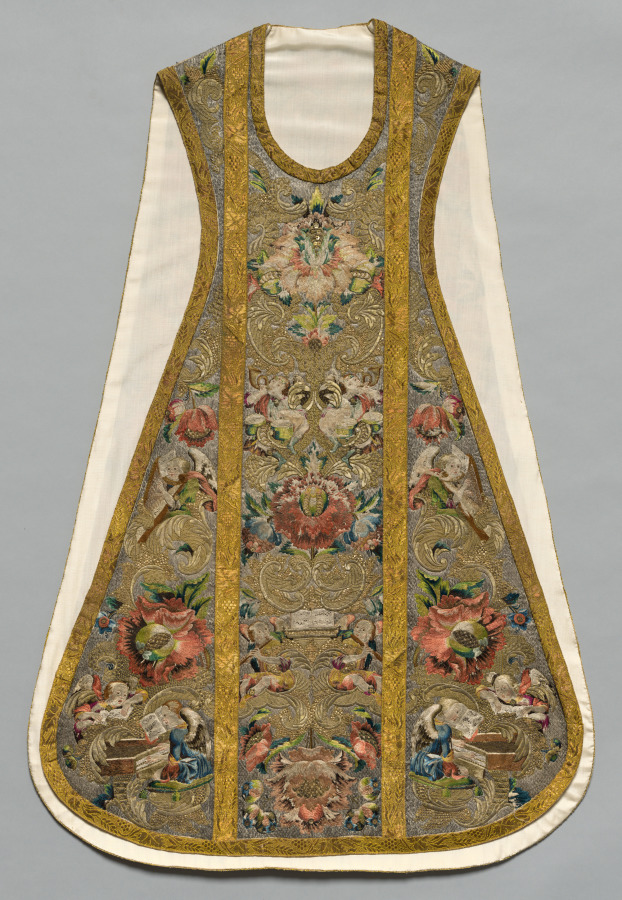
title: Chasuble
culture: Germany, Bavaria, last quarter of 17th century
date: 1675–99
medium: Silk and metallic threads on silk tabby sewn down on a linen tabby ground; embroidery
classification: Embroidery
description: This rare chasuble decorated with angels, musicians, pomegranates, and flowers represents Sacred and Profane Love. This is indicated by two figures—a clear-sighted figure embracing a blindfolded figure—standing on a globe in the upper center and also by the musicians. The angels play soft-sounding instruments (harpsichords, harps, viole da barccio, and flutes) while earthy figures play loud instruments (tambours and hunting horns). The chasuble was most likely part of a liturgical set commissioned for a wedding. This entire chasuble is embroidered with silk and metal thread laid over linen and stitched in place. The exceptionally fine workmanship, lavish use of gold and silver, and brilliant silk thread create this sumptuous vestment.